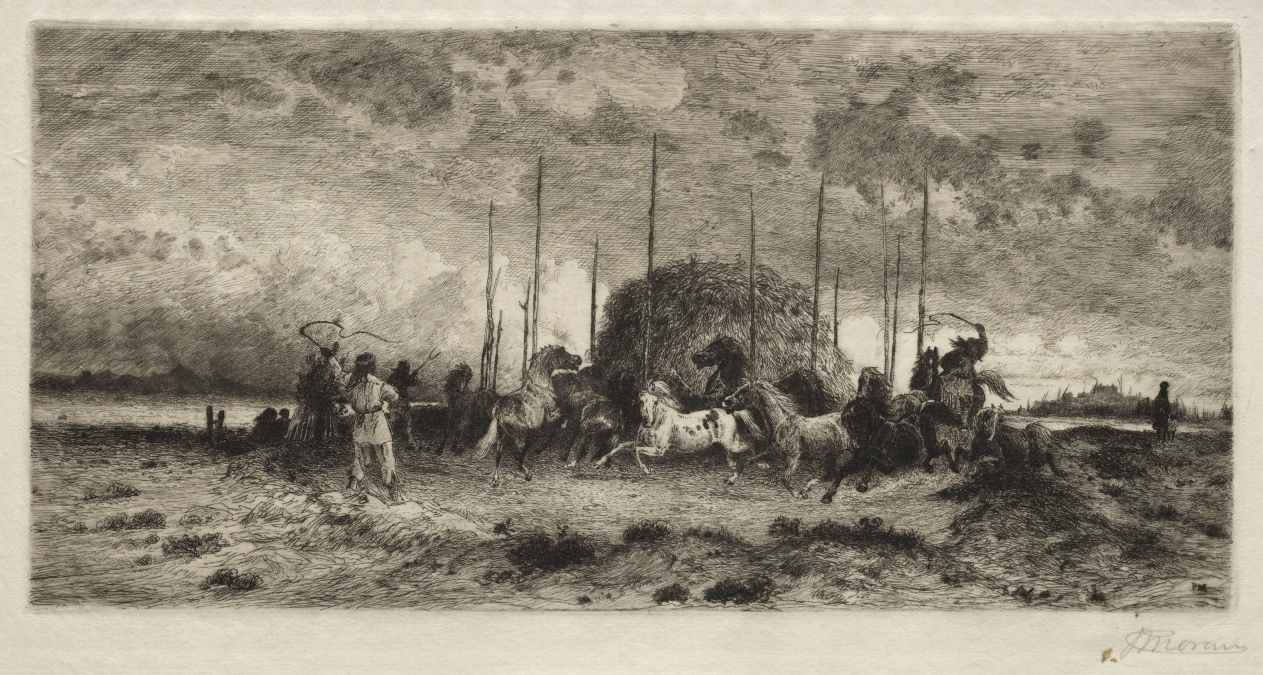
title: Harvest at San Juan, New Mexico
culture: America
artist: Peter Moran (American, 1841–1914)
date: c. 1883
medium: etching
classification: Print